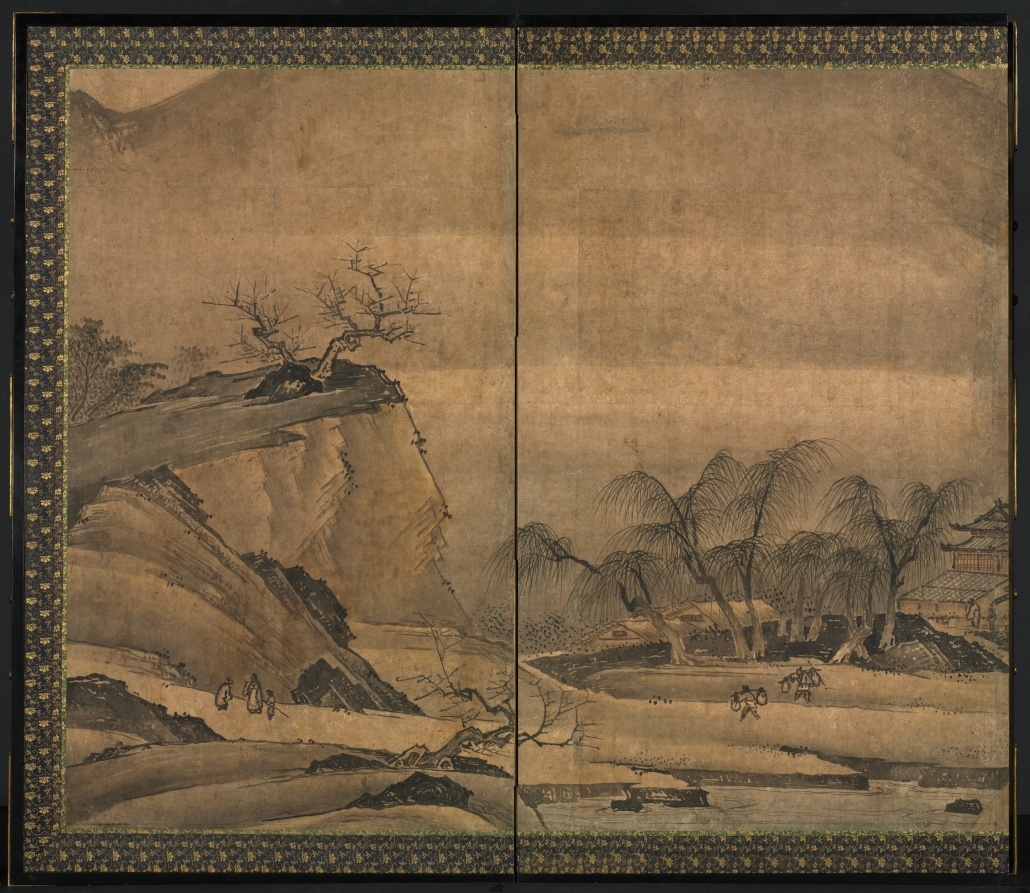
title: Landscape of the Four Seasons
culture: Korea, Joseon period (1392–1910) or Japan, Muromachi period (1392–1573)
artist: Yi Sumun (Korean, b. c. 1404)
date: late 1400s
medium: One of a pair of six-panel screens; ink and slight color on paper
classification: Painting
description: Yi Sumun is believed to have been a Korean painter who migrated to Japan in 1424 at the age of 20. This pair of screens is the artist’s most important composition in this format. Viewed from right to left, the screens show the passage of the four seasons, a popular theme in medieval Japanese ink painting.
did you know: Yi Sumun is believed to have been a 15th-century Korean man who moved to Japan at age 20 and became an influential landscape painter in Japan.